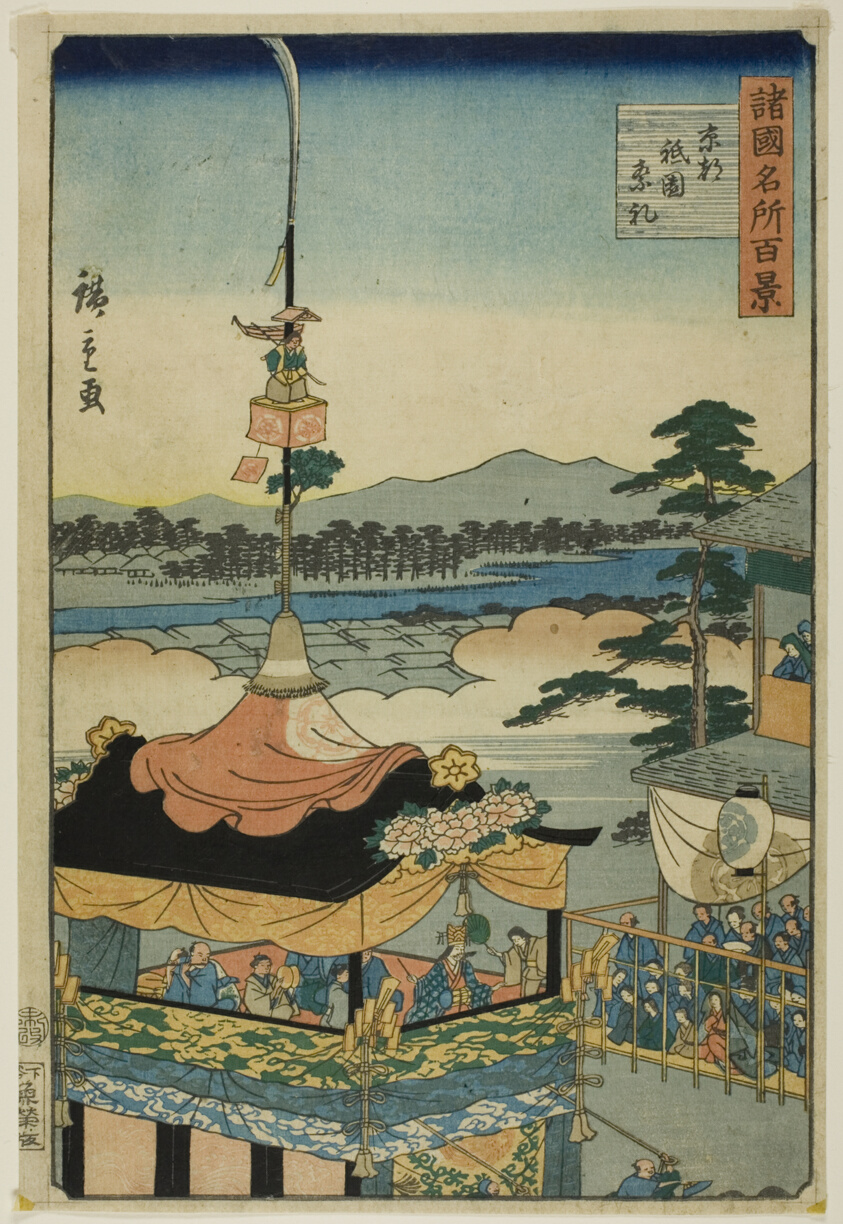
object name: Print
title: The Gion Festival, Kyoto (Kyoto Gion sairei), from the series "One Hundred Views in the Various Provinces (Shokoku meisho hyakkei)"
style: Japanese (culture or style)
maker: Utagawa Hiroshige II (Shigenobu) (Japanese, 1826-1869)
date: 1859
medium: Color woodblock print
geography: Japan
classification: woodblock print; print